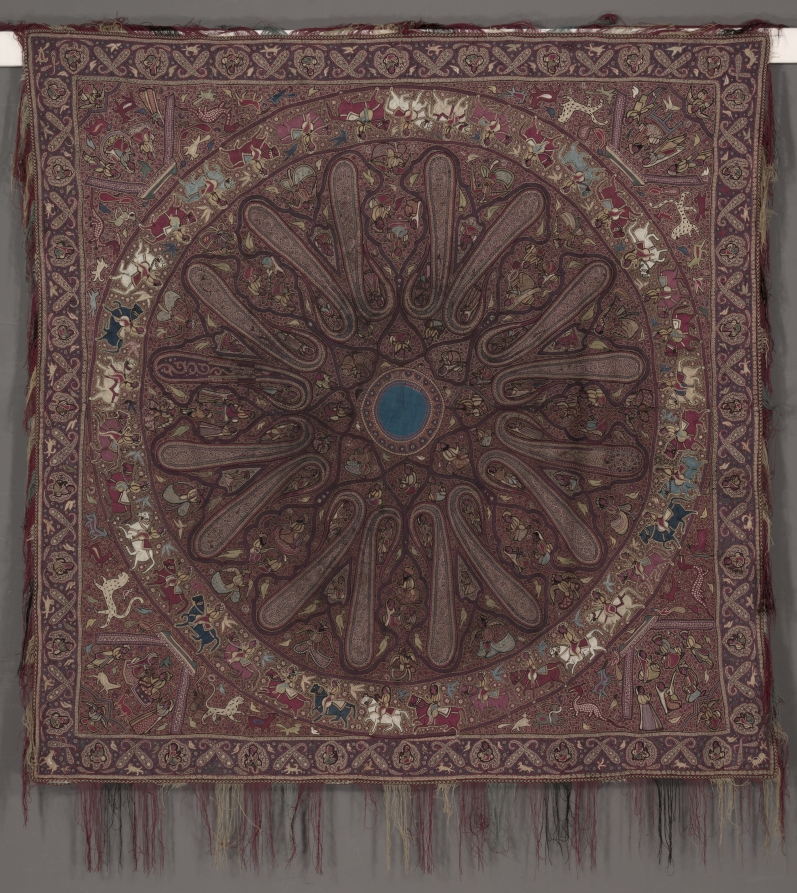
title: Square Shawl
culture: India, Kashmir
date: c. 1850–70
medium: Silk and silver filé, wool: chain stitch embroidery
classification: Embroidery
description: By the 1800s, the Himalayan foothill region of Kashmir was renowned for distinctive embroideries, and Kashmiri shawls were coveted by women throughout the British Empire. The center of this square shawl is in the form of an eight-petaled lotus, a symbol for the sun, and around it are the elongated forms of slender cypress trees, which became the inspiration for paisley. Every space is populated with figures: seated, standing, male, female, or playing musical instruments. Others are winged heavenly figures called peri. Birds are the only animals in these central spaces, suggesting a heavenly realm. In the next concentric ring riders in an equestrian procession alternate with flying birds. In the spandrels, the triangular sections between the circle and the square, are gatherings under a tent with animals. Some local Himalayan animals can be identified, such as the spotted snow leopard and the snake-eating markhor goat.